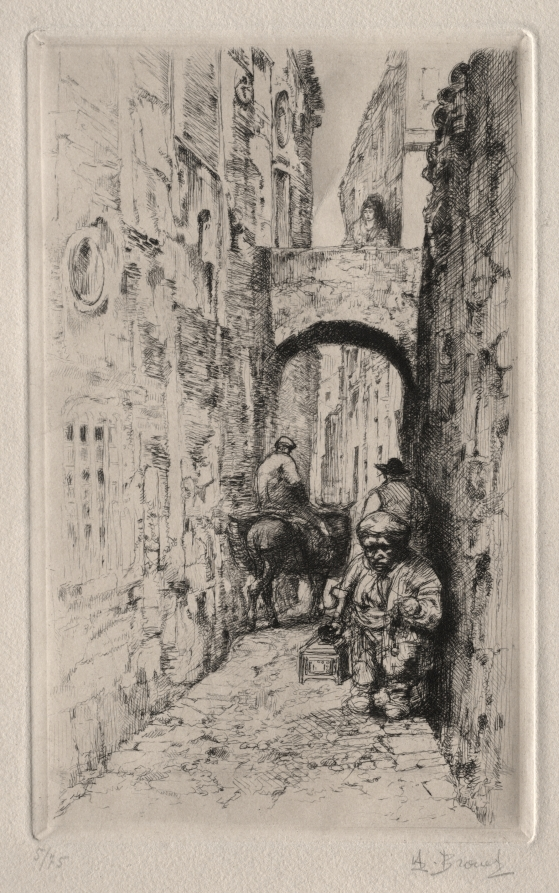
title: Dwarf in Narrow Street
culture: France, 20th century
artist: Auguste Brouet (French, 1872–1941)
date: c. 1902–41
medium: etching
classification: Print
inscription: n graphite, lower left: 5/25; lower right: A. Brouet